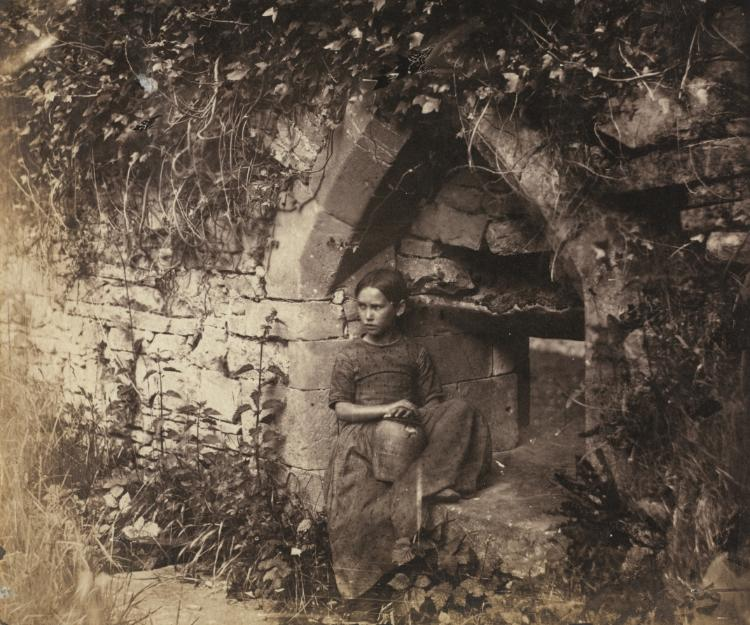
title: Tintern Abbey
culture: England, 19th century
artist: Roger Fenton (British, 1819–1869)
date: c. 1856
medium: salted paper print from wet collodion negative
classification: Photograph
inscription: Written in pencil on verso: "351"